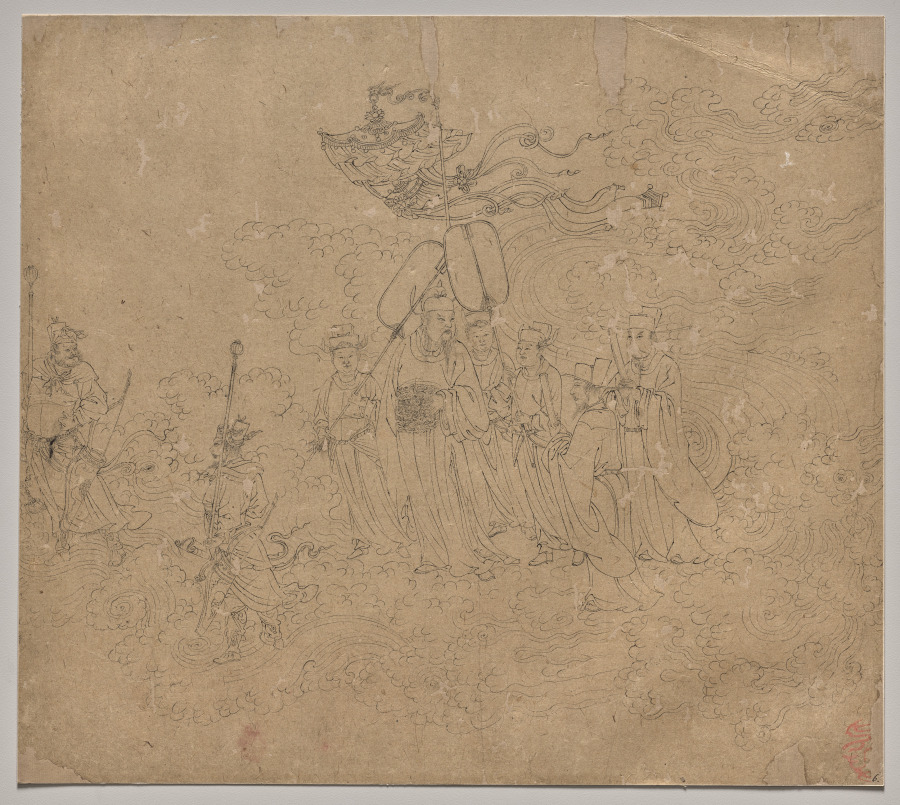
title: Album of Daoist and Buddhist Themes: Procession of Daoist Deities: Leaf 6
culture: China, Southern Song dynasty (1127-1279)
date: 1200s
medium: Album, ink on paper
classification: Painting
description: This extraordinary album has 50 paintings on a variety of religious subjects. They were likely created by several master craftsmen to share with studio apprentices as models for fulfilling commissions. The Jade Emperor and the Daoist pantheon make up the first 26 leaves. The next 14 leaves portray the Buddhist Ten Kings of Hell administering punishments to the dead. The third section, called “Clearing the Mountains,” features divine soldiers, led presumably by the deity Erlang Shen 二郎神, fighting undesirable creatures.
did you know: Six attendants escort a divine lord.